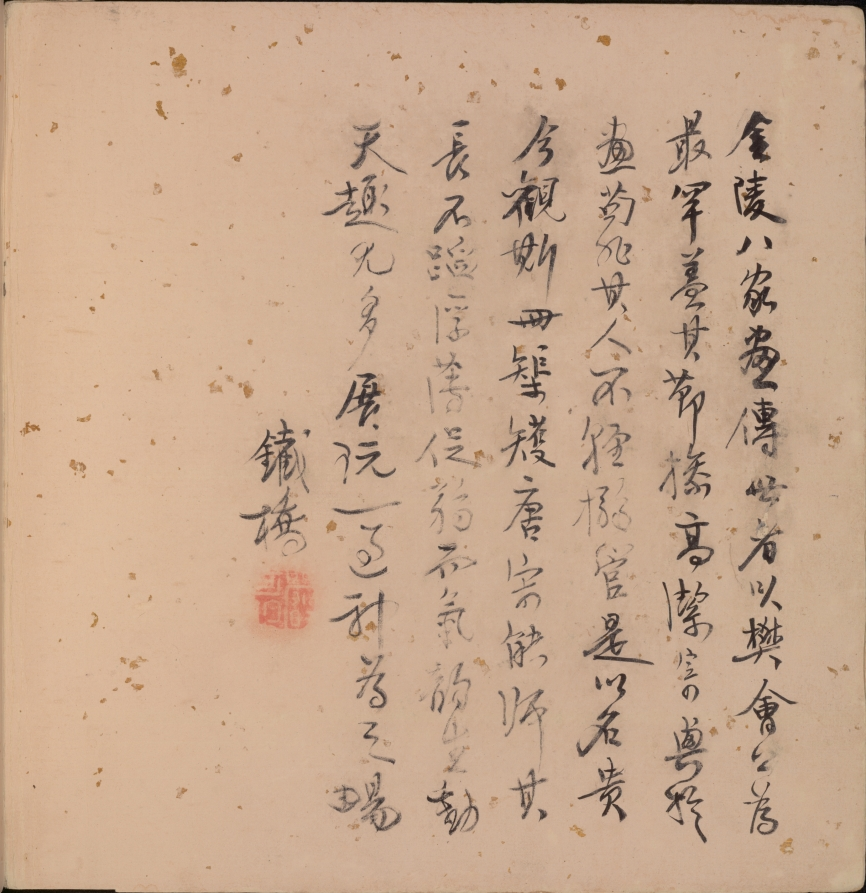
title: Album of Miscellaneous Subjects, Colophon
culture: China, Qing dynasty (1644-1911)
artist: Fan Qi (Chinese, 1616–after 1694)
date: early 1650s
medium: album leaf, ink and color on silk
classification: Painting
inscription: 1 colophon and 1 seal of Tomioka Tessai 富岡鐵齋 (1836-1924)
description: The Japanese artist Tomioka Tessai (1836-1924) adds a colophon on the last page, commenting on the rarity of Fan Qi's paintings among those of the Eight Masters of Nanjing. They were modeled after Tang and Song masters and captured the rhythms of life. "Whenever I open this album, my mind is pleased," he writes.